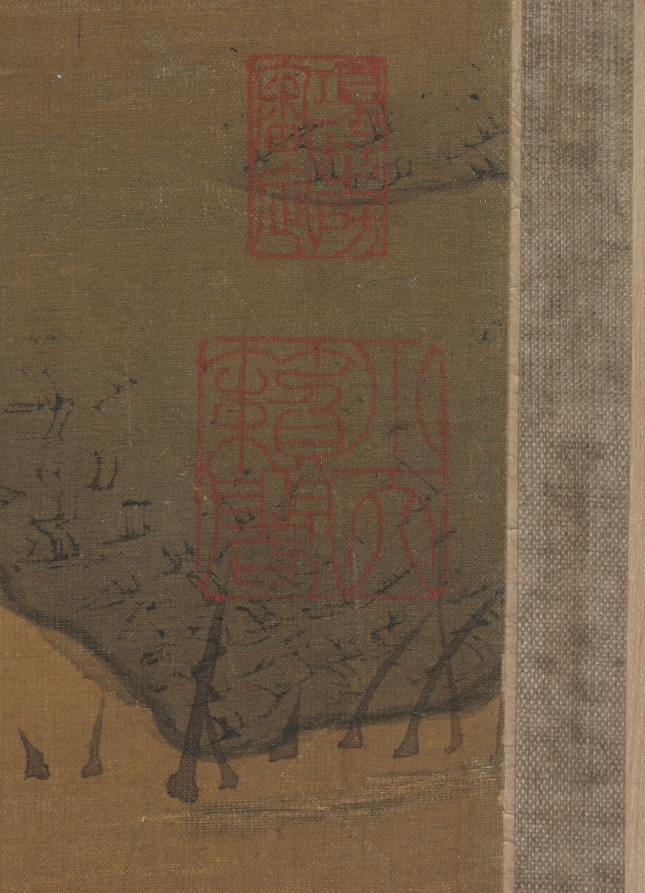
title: Xu Jingyang Moving His Family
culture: China, Ming dynasty (1368–1644)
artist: Cui Zizhong (Chinese, 1574–1644)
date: 1644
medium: Hanging scroll; ink and color on silk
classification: Painting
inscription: Artist's 2 seals: Pei-hai, Cui Zizhong yin.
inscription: 9 additional seals: 2 of Xiang Yuan (18th-19th c.); 1 of Tang Zuomei (late 18th-19th c.); 1 of Zhang Heng 張珩 (1915-1963); 1 of C. C. Wang 王季遷 (1907–2003); 4 unidentified.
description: Xu Jingyang was a dedicated fourth-century Confucian official who allegedly turned into a Daoist immortal. This scroll depicts the legend that when he attained immortality, he took his entire household, including chickens and dogs, to paradise. Cui Zizhong’s painting style intentionally referenced ancient masters. Typical of the pre-Song dynasty landscape tradition, there is the use of blue and green colors and an emphasis on outline rather than texture. While the trembling outlines are reminiscent of earlier painters, the flickering light on rocks and trees is a stylistic feature of Cui’s own time.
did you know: Xu Jingyang, wearing red, is in the upper register of figures, while below his servants transport a rooster, dog, and other supplies.